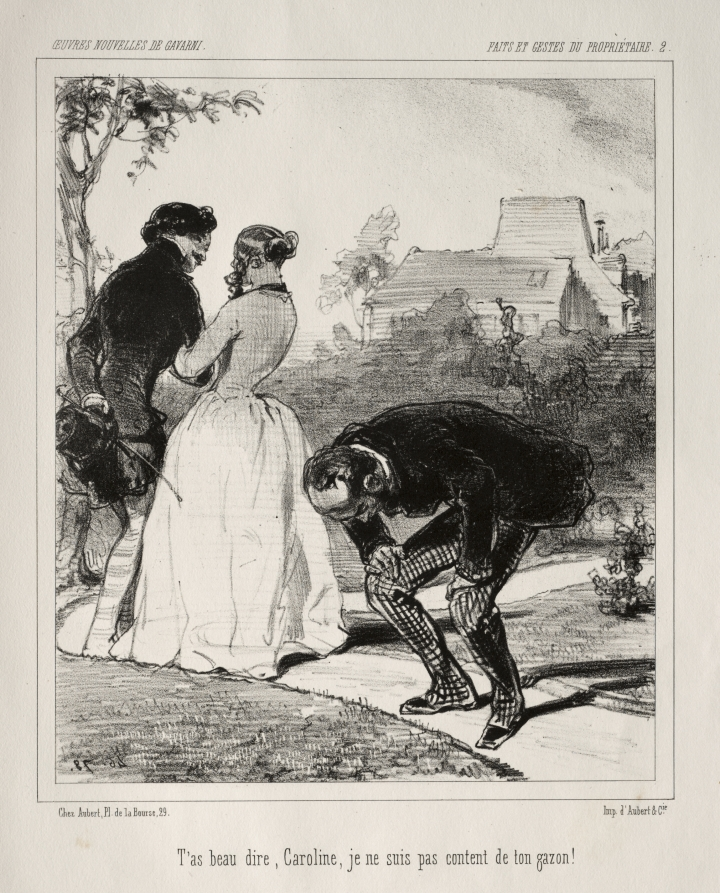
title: Faite et Gestes du Propriétaire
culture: France, 19th century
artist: Paul Gavarni (French, 1804–1866)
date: c. 1847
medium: lithograph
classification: Print